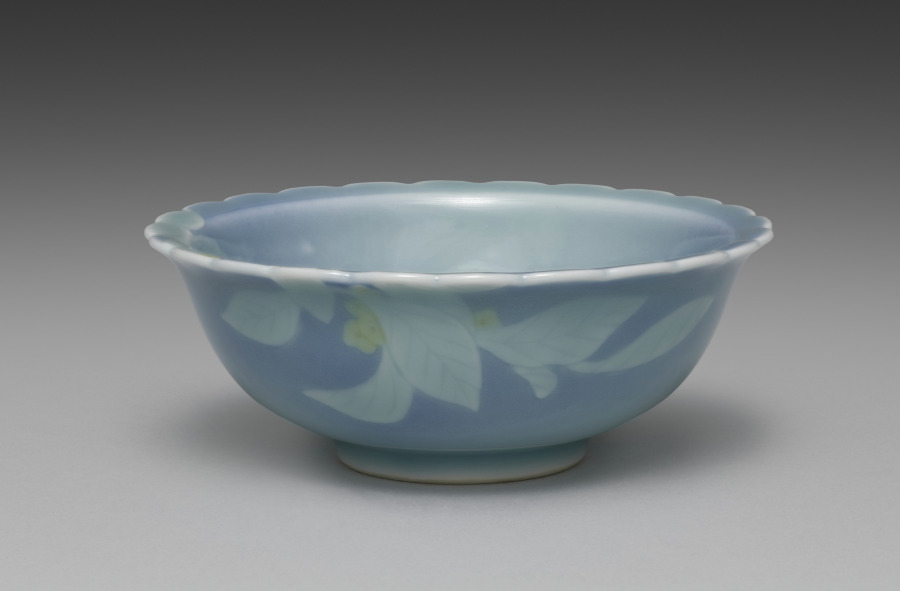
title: Dish from Dishes with Flowers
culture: Japan, Taishō period (1912–26) or Shōwa period (1926–89)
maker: Seifū Yohei IV (Japanese, 1872–1951)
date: 1914–46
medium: One from a set of five dishes; porcelain with underglaze yellow and blue glaze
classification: Ceramic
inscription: 清風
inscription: 清風造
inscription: 成山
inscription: 清風盧人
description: One can imagine a cool summer breeze when looking upon this set of dishes, each shaped with a crenulated mouth and glazed with blue. Around the rim and into the basin, the bowls have low-relief designs of flowers with underglaze yellow petals; their leaves and stems show white through the glaze. On each dish, the design continues over the rim onto one side.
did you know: Seifū Yohei IV’s dishes with flowers feature underglaze yellow.